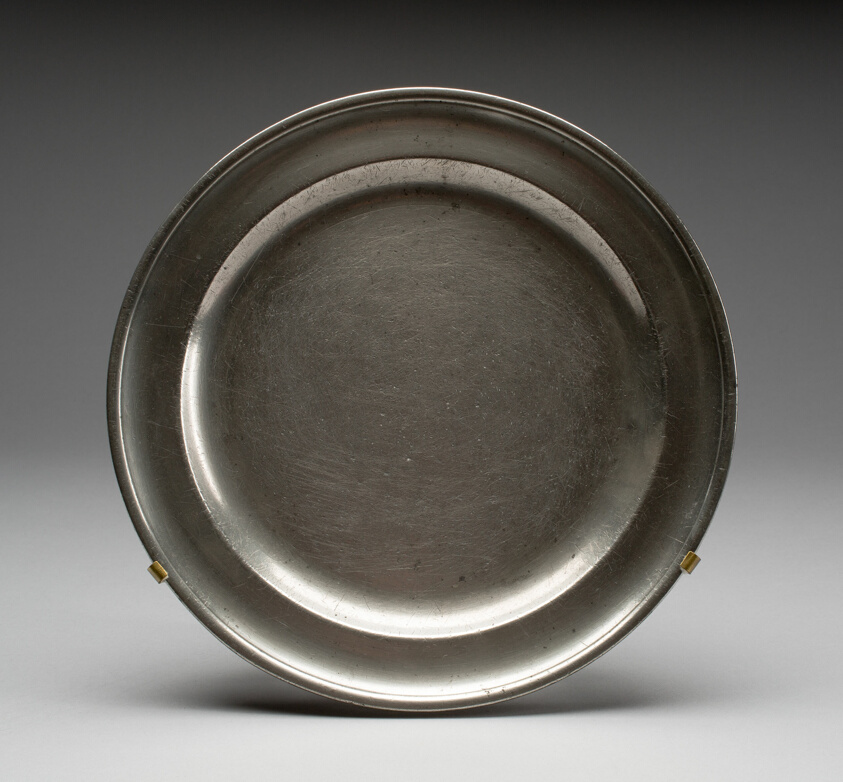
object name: Decorative Arts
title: Plate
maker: Thomas Badger (American, 1764–1826)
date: c. 1789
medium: Pewter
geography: Boston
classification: metalwork; american decorative arts; american arts; decorative arts